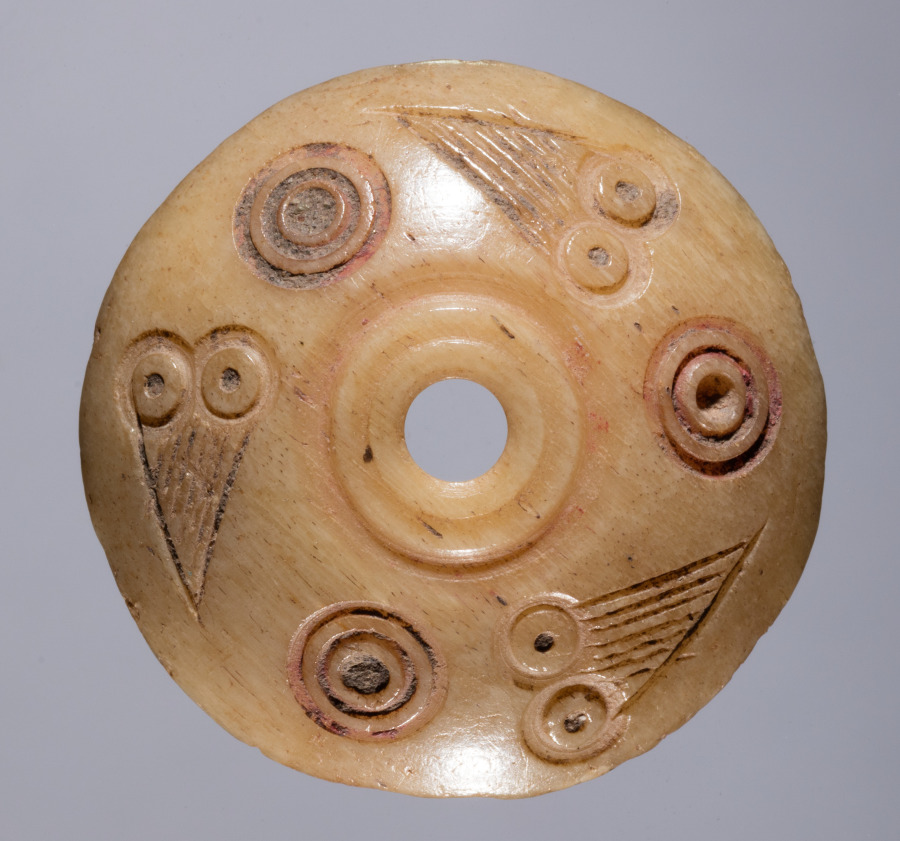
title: Spindle Whorl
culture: Iran, early Islamic period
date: 700s - 900s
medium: bone, incised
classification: Spindle Whorl